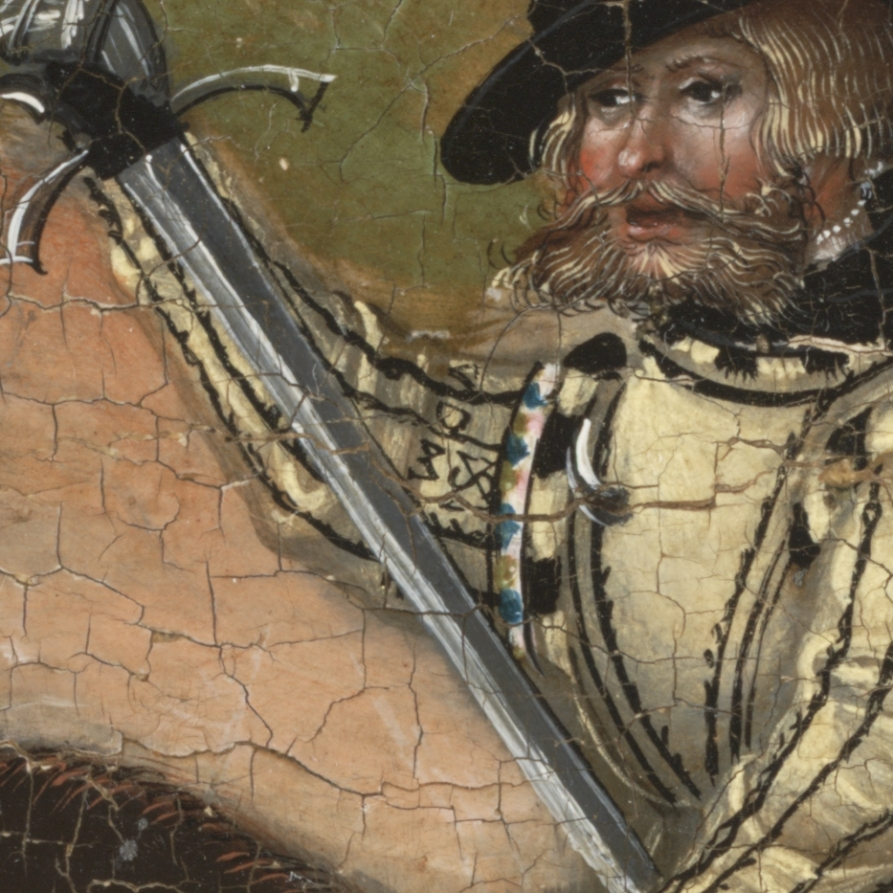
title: Hunting near Hartenfels Castle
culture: Germany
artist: Lucas Cranach (German, 1472–1553)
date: 1540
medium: oil, originally on wood, transferred to masonite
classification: Painting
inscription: Signed lower right on boat with a winged serpent, and dated: 1540 [inventory number, lower right: 1577]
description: The Protestant rulers of Saxony commissioned this animated hunt scene, set near their residence seen in the background, Hartenfels Castle (in eastern Germany). John Frederick the Magnanimous, in the bottom left corner, wears dark green hunting attire; he spans his crossbow and waits for his courtiers and dogs to chase a stag across the river. His wife, the Electress Sibylle, stands at right, poised to take the first ceremonial shot. The prince electors of Saxony were passionate practitioners of hunting with dogs—elaborate, highly rehearsed occasions, coordinated by the use of signals from hunting horns. Cranach dated this work and his signature is the winged snake at lower right. 1577 in the right corner is an inventory number.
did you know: Humans, dogs, and deer make up most of the creatures in this busy scene—but not all of them! Look closely at the background to spot a bear and three boars.